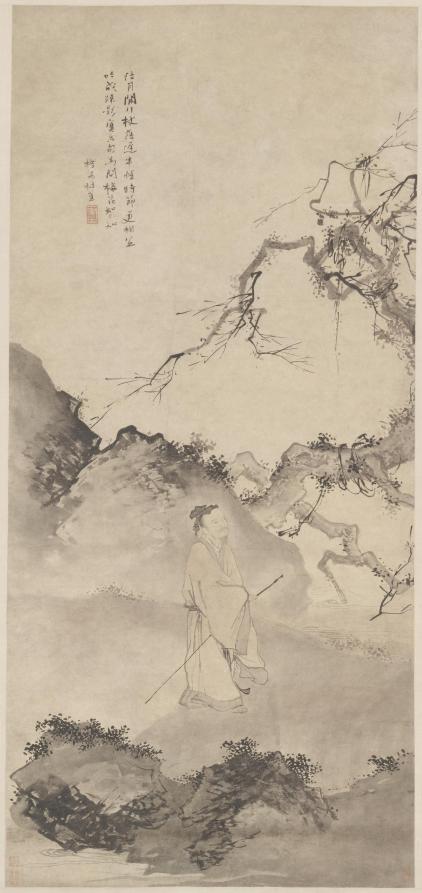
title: The Poet Lin Bu Wandering in the Moonlight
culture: China, Ming dynasty (1368–1644)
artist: Du Jin (Chinese, 1446-c. 1519)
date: late 1400s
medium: Hanging scroll; ink and color on paper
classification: Painting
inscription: 陪月閒行杖屨遲，半醒時節更相宜。 吟成疏影寒香句，為問梅花知不知。 檉居杜堇 [印]一書生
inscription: 1 seal of Zhang Heng 張珩 (1915–1963)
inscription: 1 seal of C. C. Wang [Wang Jiqian] 王季遷 (1907–2003)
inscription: 1 unidentified seal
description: Lin Bu (967–1028), a Northern Song (960–1127) poet and hermit who lived at the West Lake in Hangzhou, was known for having plum trees for his female companions and cranes for his children. This hanging scroll depicts the poet walking in the moonlight and looking at the plum tree, a scene described in his most well-known poem on plum blossoms. Surviving works signed by Du Jin are rare and this painting is one of them. Here, the artist used lively brushwork to depict the plum tree and rocks, exemplified in varying dots and strokes, and sweeps in different shades of ink.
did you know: Lin Bu withdrew from prestigious government service and lived as a hermit by the West Lake in Hangzhou.